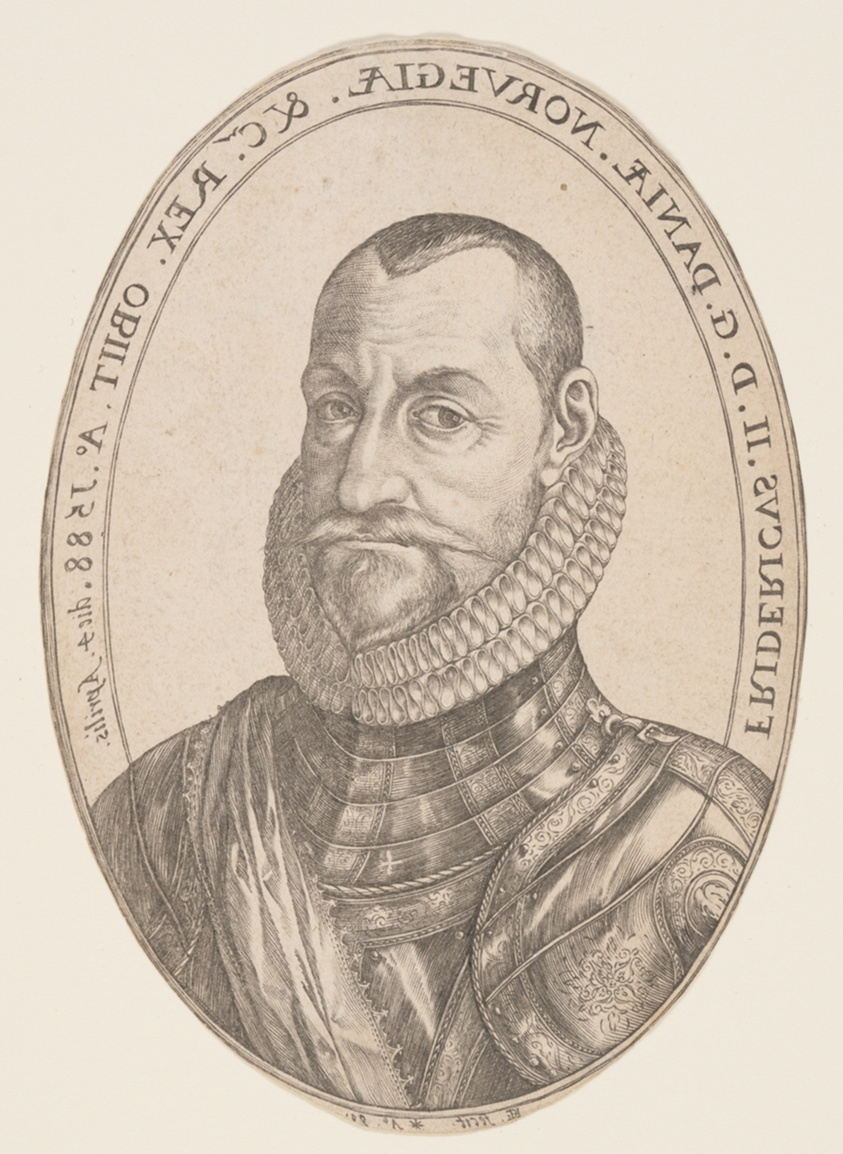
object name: Print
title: Frederick II, King of Denmark and Norway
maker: Hendrick Goltzius (Dutch, 1558–1617)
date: 1590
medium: Counterproof of an engraving on laid paper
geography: Netherlands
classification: engraving; paper; print; prints and drawing